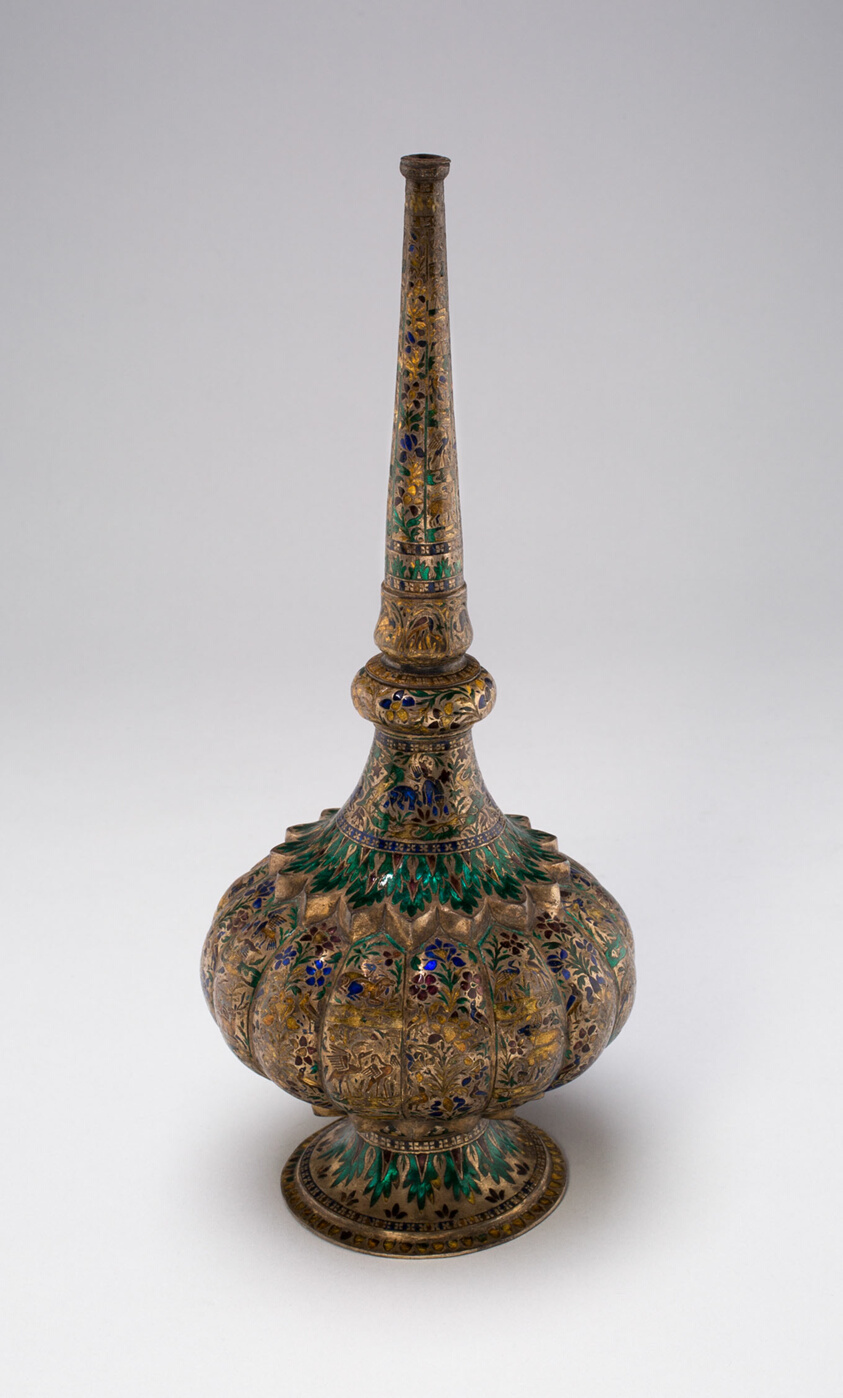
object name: Decorative Arts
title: Rose Water Sprinkler (gulab pash)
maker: India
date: Late 18th century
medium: Silver and enamel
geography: India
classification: silver; metalwork; asian art; decorative arts